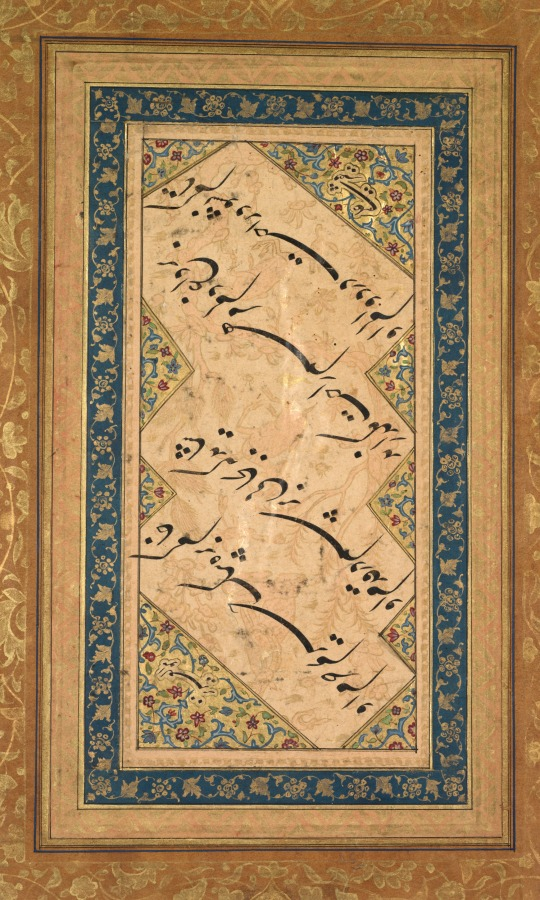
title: Calligraphy from a Ghazal of Badr al-Din Hilali Jaghata’i (Persian, active c. 1500)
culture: Iran, Safavid period (1501–1722)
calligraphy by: Faqir Ali (Persian, active c. 1550–1610)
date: c. 1550; borders added c. 1700s and mounted upside down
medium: ink on paper (verso)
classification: Calligraphy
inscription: Calligraphy, Persian verses in nasta‘liq script: He is Venerable!/ I am the dust on the path of the messenger to my beloved’s hallowed sanctuary;/ Perchance I may reach the destination in his footsteps./ On the burn in my branded heart, do not place any soothing balm,/ So that the comfort that I draw from my pain and sorrow for my beloved does not abate.